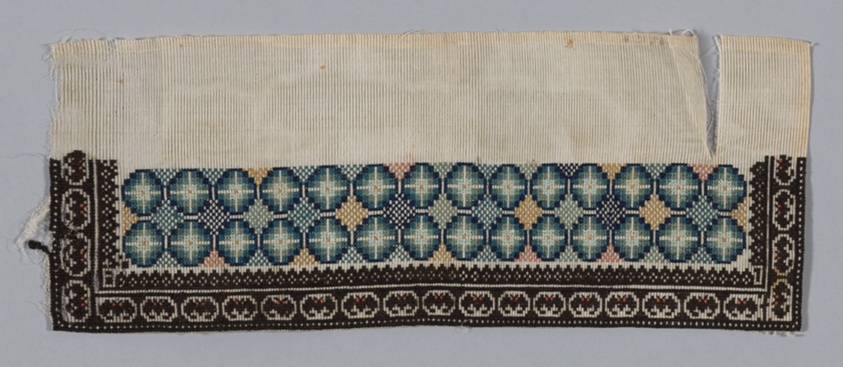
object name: Costume and Accessories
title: Woman's Trouser Band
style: qing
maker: Han-Chinese (China)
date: Qing dynasty (1644–1911), 1875/1900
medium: Embroidered in shades of blue and black on gauze.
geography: China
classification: textile; weaving; needlework (visual works); costume - weaving; costume